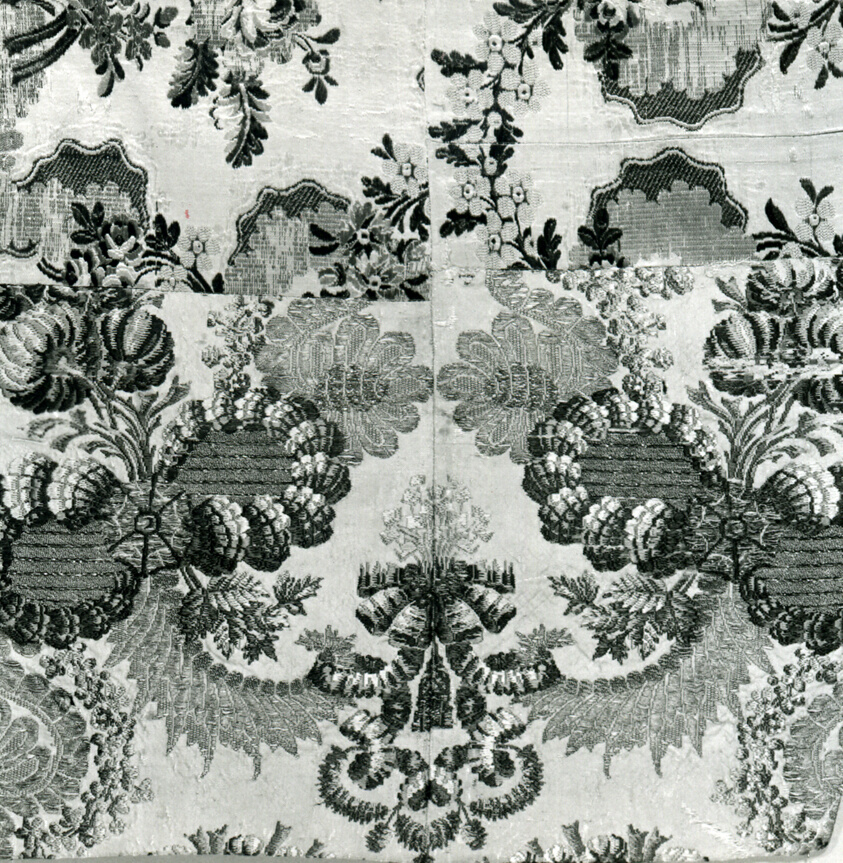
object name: Textile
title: Fragment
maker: France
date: 18th century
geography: France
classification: textile; weaving